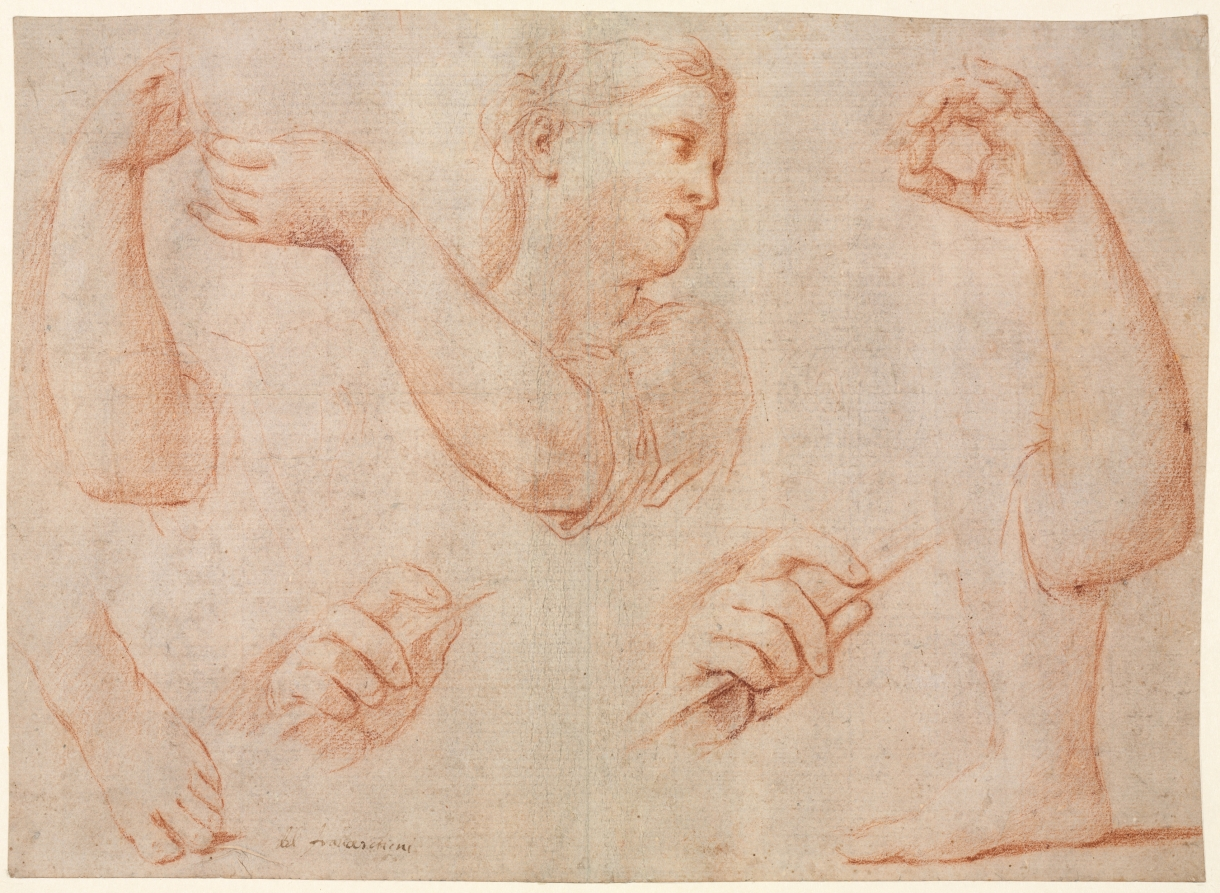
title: Study of a Young Woman Playing a Tambourine, and Studies of an Arm, Hands, and Feet (Studies for "Miriam Leading the Chorus of Women Who Give Thanks for the Routing of Pharoah"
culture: Italy, 18th century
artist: Marcantonio Franceschini (Italian, 1648–1729)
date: c. 1711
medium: red chalk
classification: Drawing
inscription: inscribed: del franceschini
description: This sheet of studies in red chalk was made in preparation for the composition Miriam Leading the Chorus of Women Who Give Thanks for the Routing of Pharaoh, a final episode in the story of the Israelites' exodus from Egypt. The Bolognese artist Marcantonio Franceschini painted the cartoon of the complete composition between 1711 and 1712, and it was used to decorate an important papal building, the Palazzo della Cancelleria in Rome, where it remains today. While the studies of feet and the head and shoulders with raised arms are for the principal figure of Miriam playing the tambourine, the arm on the right and the two hands holding a rod are studies for an attendant figure who plays the triangle behind Miriam.